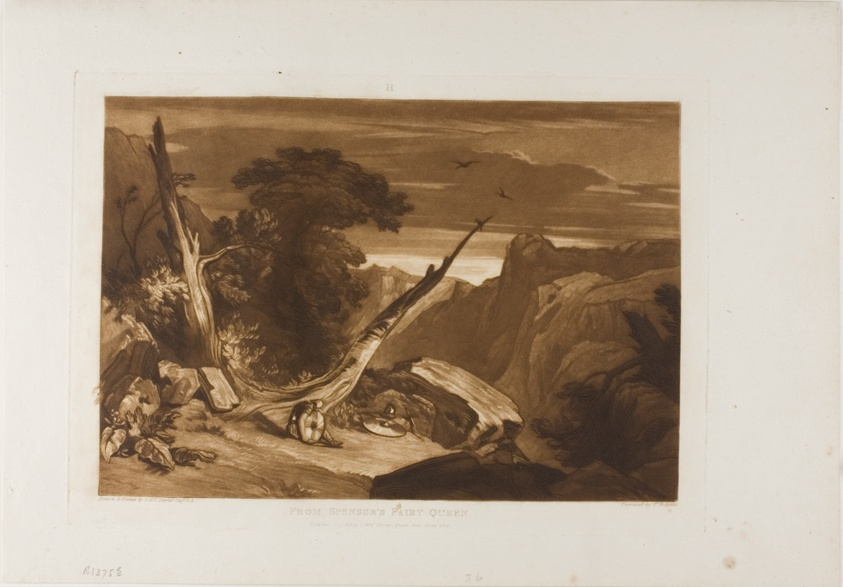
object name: Print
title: From Spenser's Fairy Queene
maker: Joseph Mallord William Turner (English, 1775-1851); Engraved by T. Hodgetts (English)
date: published June 1811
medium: Etching and engraving in brown on ivory laid paper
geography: England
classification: etching; print; prints and drawing